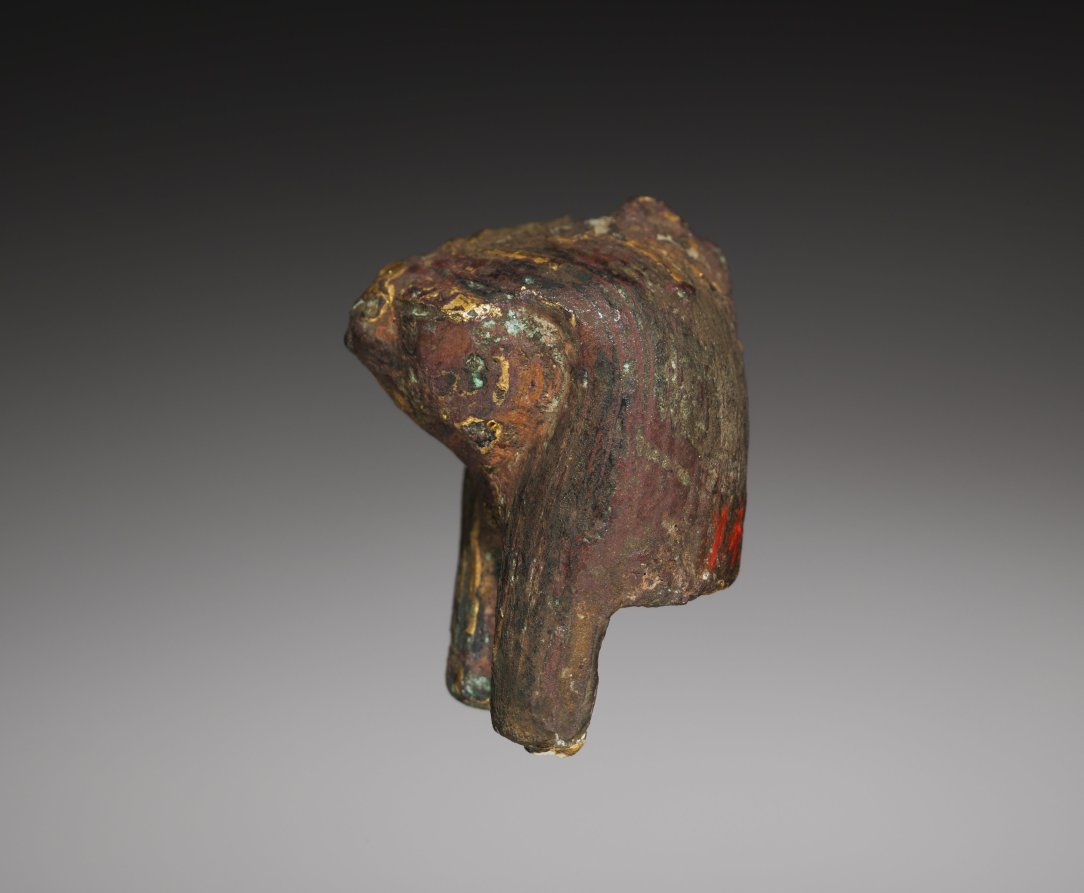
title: Falcon's Head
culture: Egypt, New Kingdom (1540–1069 BCE), Dynasties 18–19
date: 1350–1250 BCE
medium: face of bronze inlaid with gilt copper, wig of black copper (?) with copper striations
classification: Sculpture